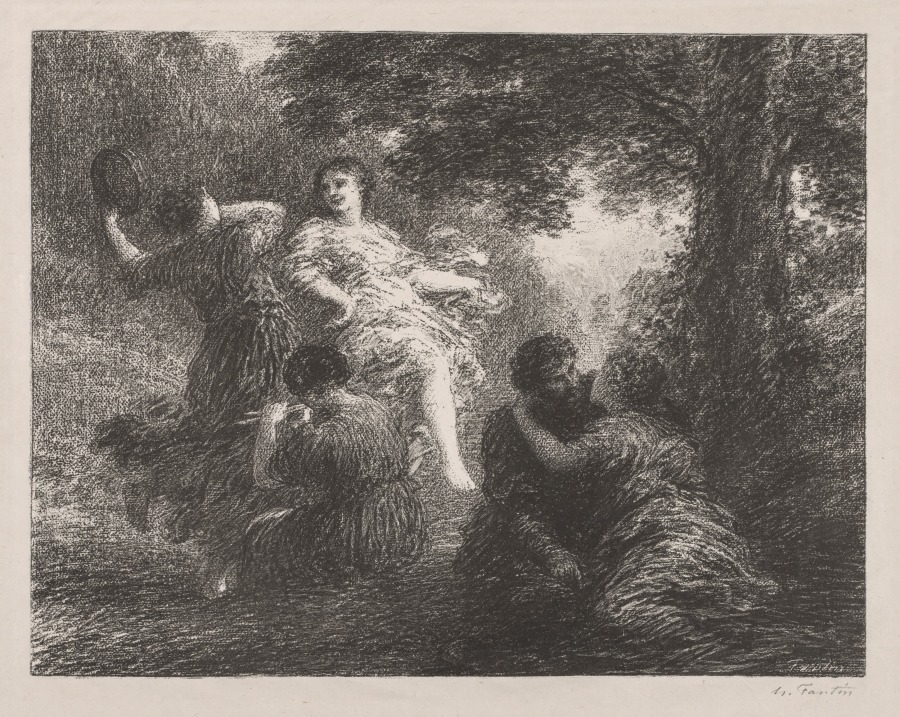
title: Pastorale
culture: France, 19th century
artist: Henri Fantin-Latour (French, 1836–1904)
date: 1896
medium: lithograph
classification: Print